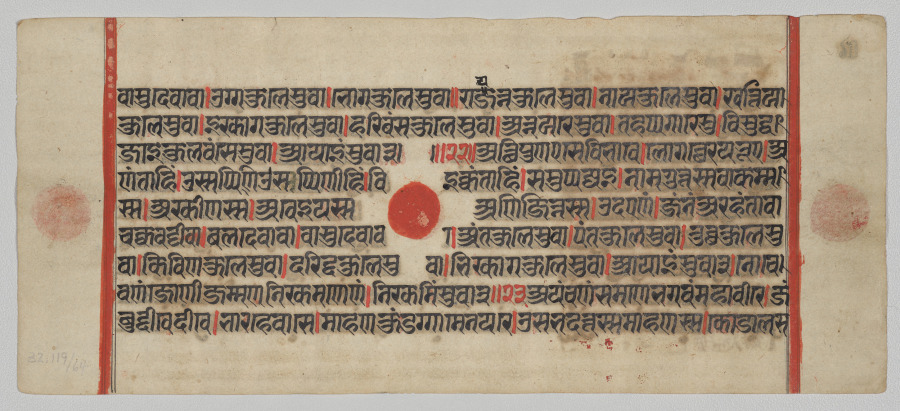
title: Text, Folio 10 (recto), from a Kalpa-sutra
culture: Western India, Gujarat, last quarter of the 15th century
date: c. 1475–1500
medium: Gum tempera, ink, and gold on paper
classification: Painting